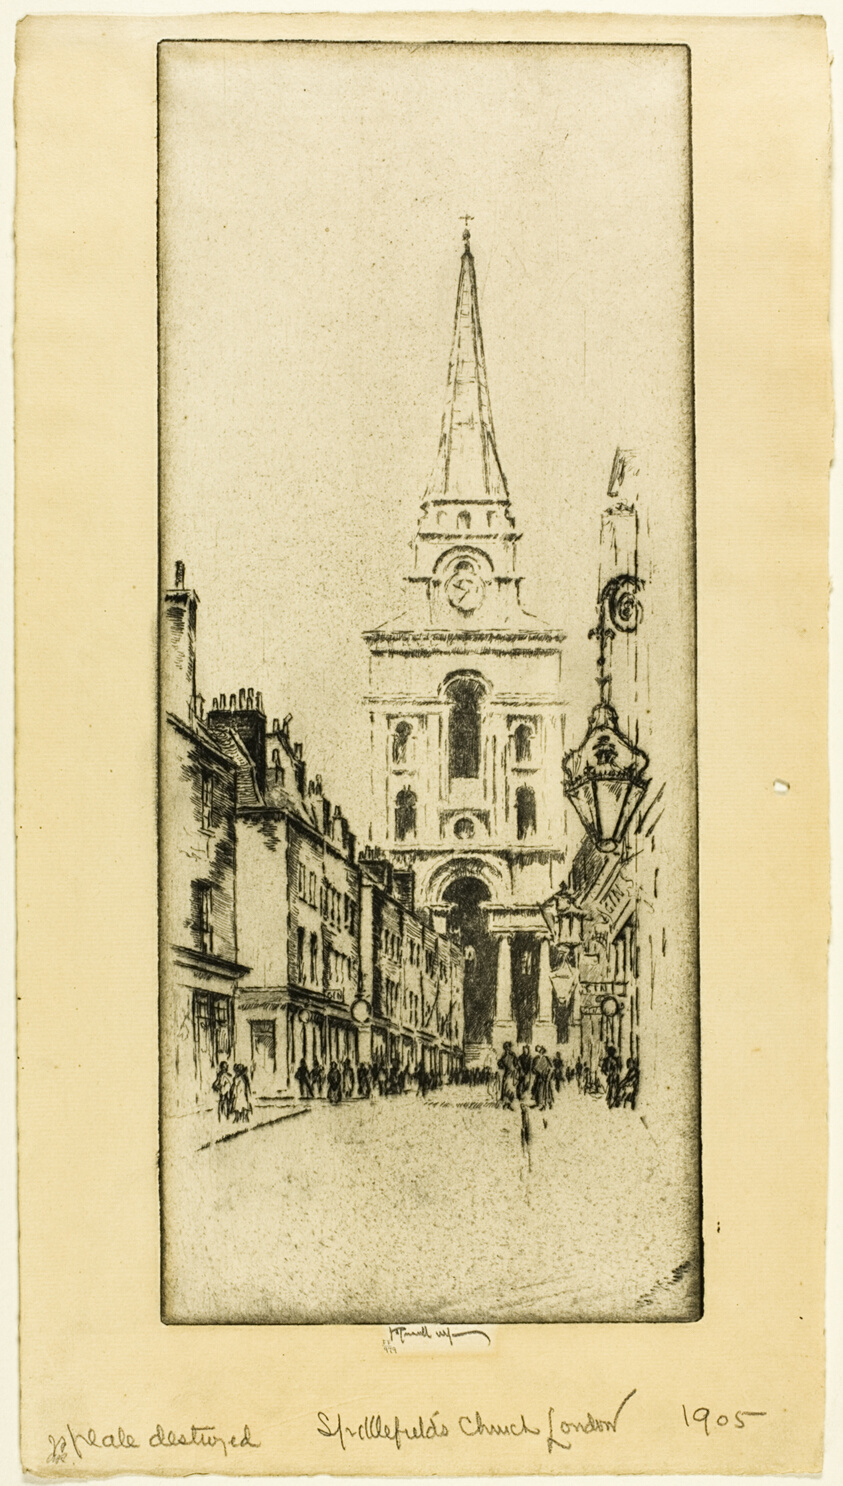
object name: Print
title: Spitalfields Church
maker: Joseph Pennell (American, 1857-1926)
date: 1906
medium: Etching on buff laid paper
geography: United States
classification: etching; prints and drawing; print